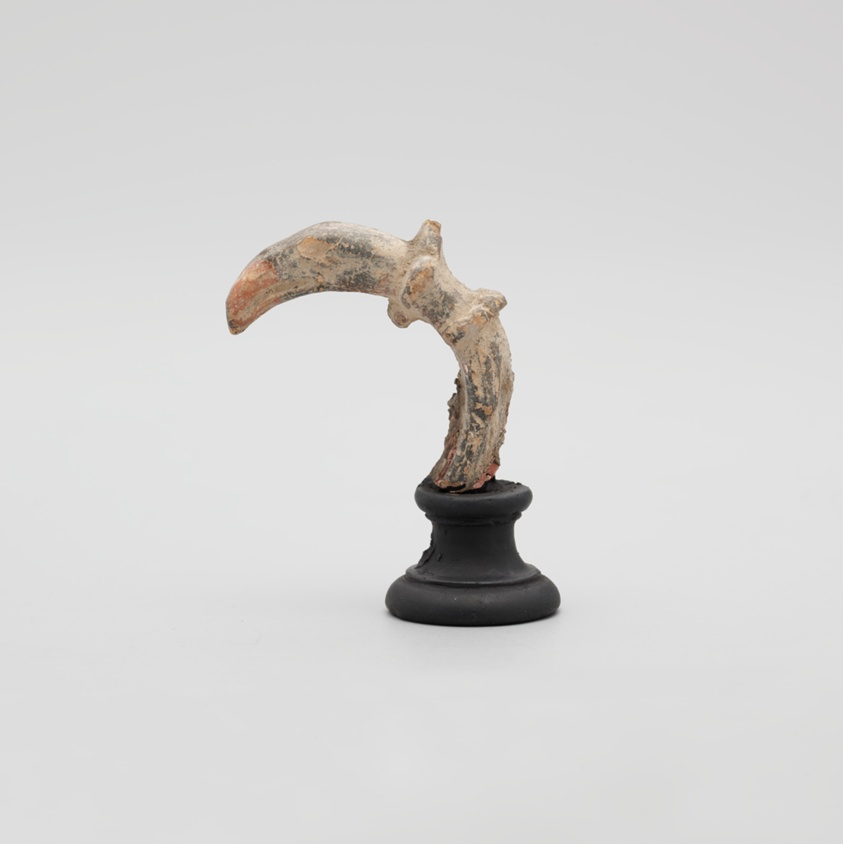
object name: Sculpture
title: Fragment of a Bird Head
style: greek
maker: Greek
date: 2nd/1st century BCE ?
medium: terracotta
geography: Greece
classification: earthenware; ceramics; sculpture; ancient art